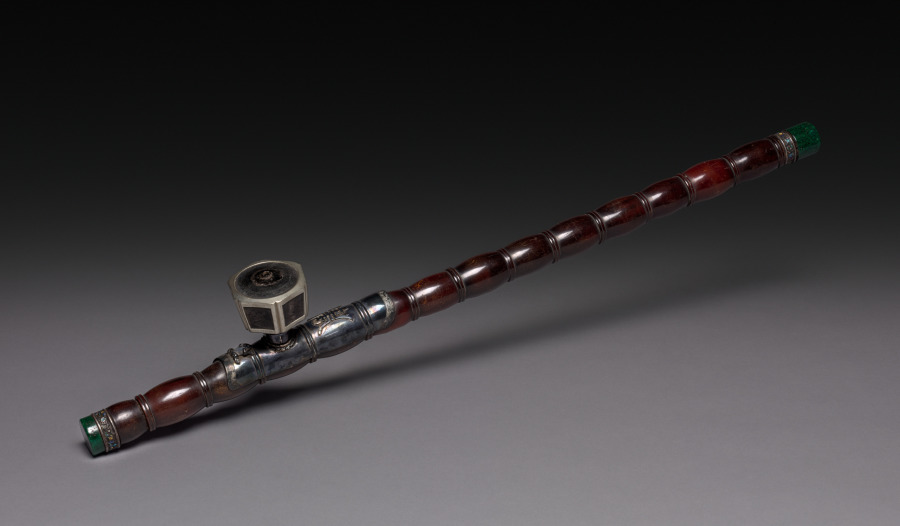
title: Opium Pipe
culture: China, Qing dynasty (1644-1911)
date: 1800s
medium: wood with silver and enamel ferrules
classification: Miscellaneous